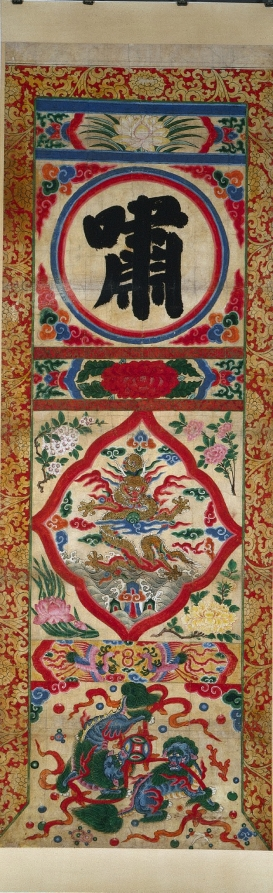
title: Painted Panel of Character "Whistle"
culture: Korea, Joseon dynasty (1392–1910)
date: early 1900s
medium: hanging scroll, ink and color on paper; unmounted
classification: Painting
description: This set of four colorful hanging scrolls may have been used in an outdoor Buddhist ritual to evoke heavenly blessings. Each hanging scroll bears four different character; tiger, dragon, whistle, and recite. Traditionally, tiger and dragon belong to the four directional guards, respectively west and east.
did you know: This set of four colorful hanging scrolls may have been used in an outdoor Buddhist ritual to evoke heavenly blessings.